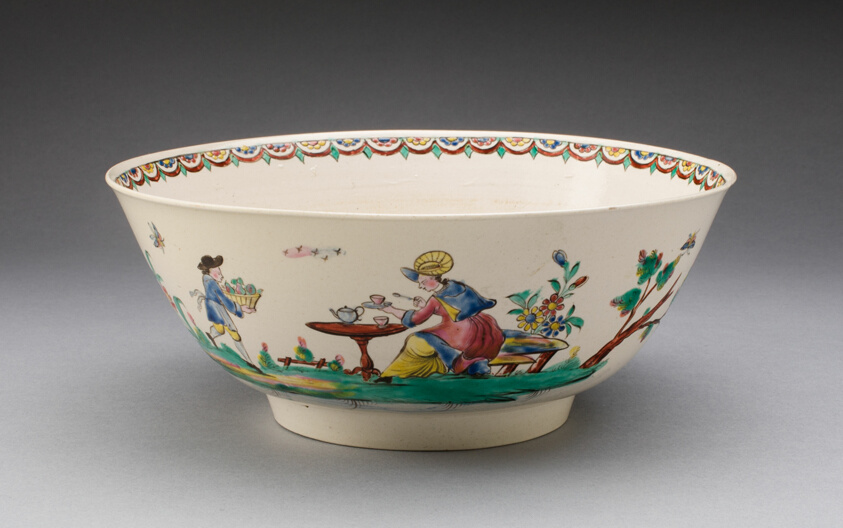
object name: Ceramics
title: Bowl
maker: Staffordshire, England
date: c. 1760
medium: Salt-glazed stoneware, polychrome enamels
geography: Staffordshire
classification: bowl; dish (vessel); european decorative arts; ceramics; stoneware; salt-glazed stoneware